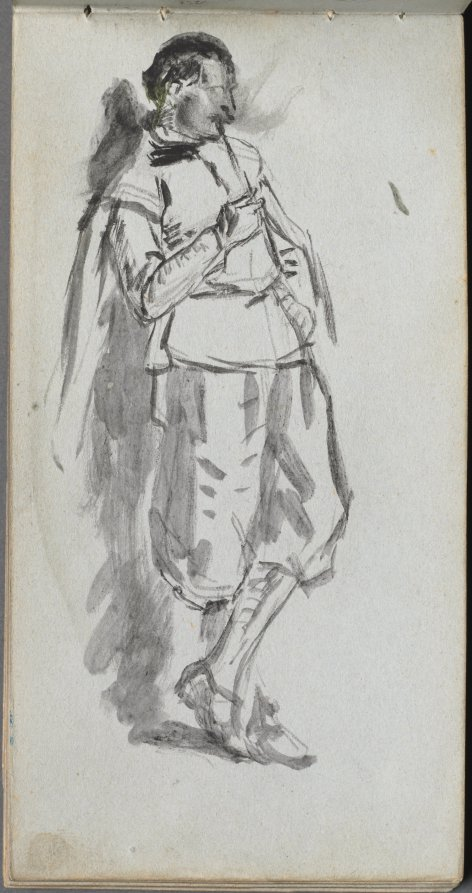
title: Sketchbook, page 46: Standing Male Figure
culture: France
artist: Ernest Meissonier (French, 1815–1891)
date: c. 1860s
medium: graphite, pen, ink, and wash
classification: Bound Volume